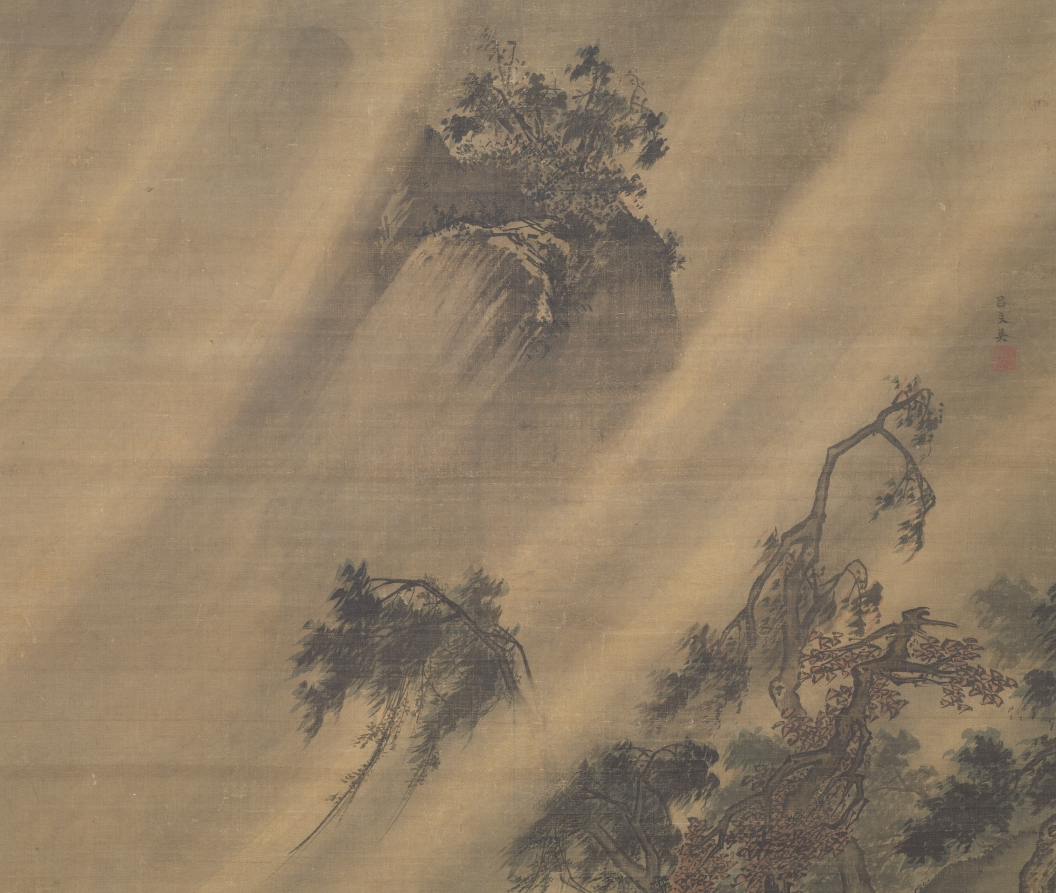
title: River Village in a Rainstorm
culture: China, Ming dynasty (1368–1644)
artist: Lu Wenying (Chinese)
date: c. 1480–1507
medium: Hanging scroll; ink and slight color on silk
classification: Painting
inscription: 呂文英 [印] 日近清光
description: In this scene, windswept rain pelting a village captures the power of nature in a masterful composition. Lü Wenying from Zhejiang served as a court painter during the Hongzhi era (1488–1505). Hardly known, with few remaining works, he is considered a Zhe school painter who followed the style of the Southern Song academy. Zhe school painters, named after the province of Zhejiang, transformed the poetic scenery of the Southern Song artists into dramatic, large-scale views. Active in the same region with frequent monsoon rains in the summer season, artists were familiar with outbreaks of rain and storms.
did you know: A young boy peeks out a window perhaps viewing the two people struggling through the rain.